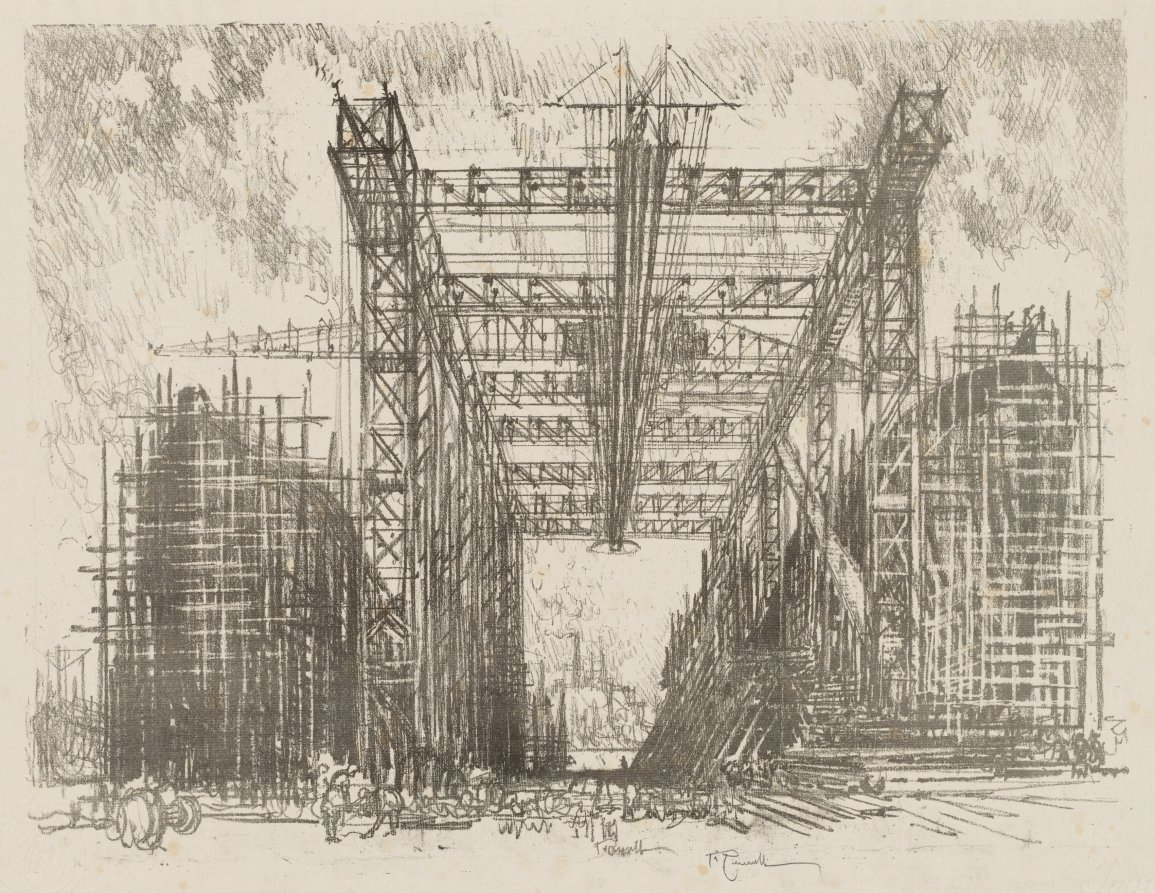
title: English War Work: The Gantry (A Merchant Shipyard)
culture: America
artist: Joseph Pennell (American, 1857–1926)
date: 1916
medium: lithograph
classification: Print